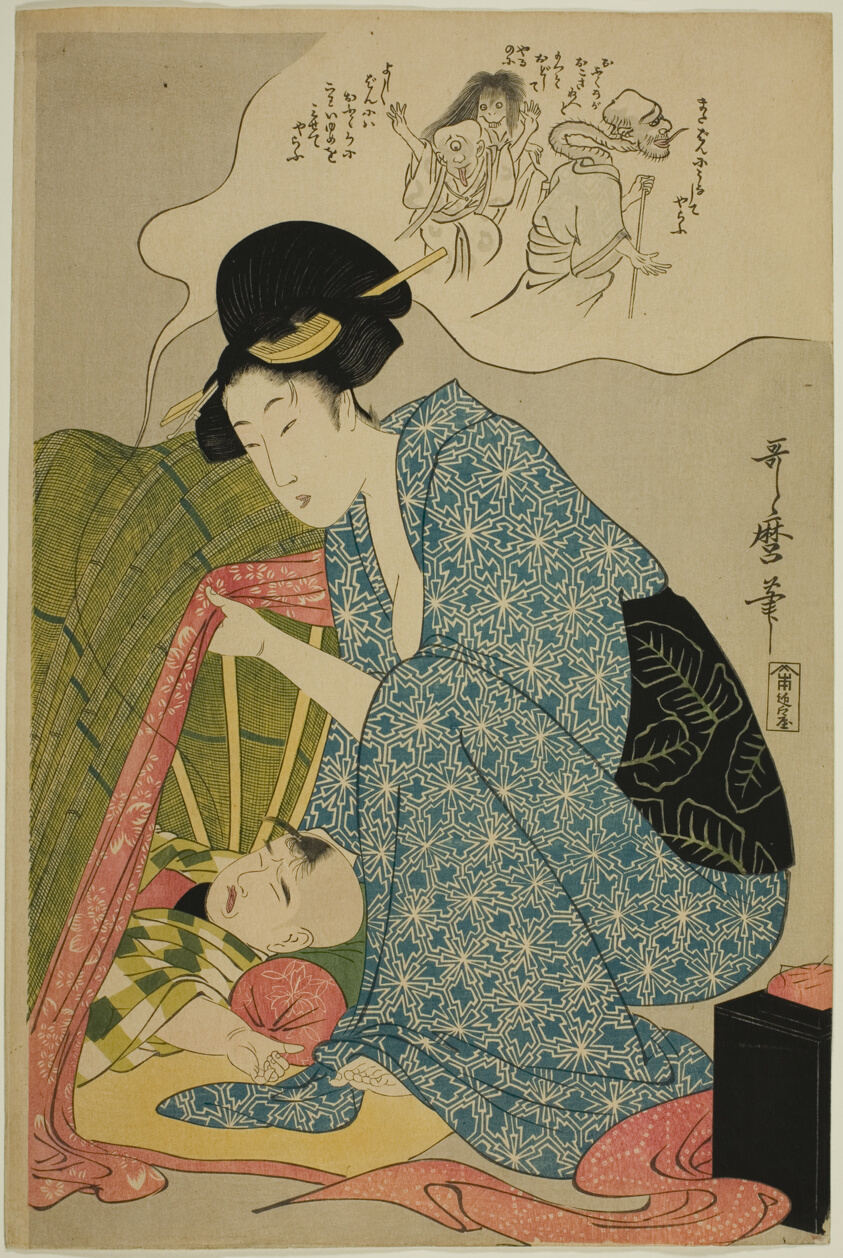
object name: Print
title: Child's nightmare of ghosts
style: Japanese (culture or style), edo (japanese period), Japanism, East Asian, asian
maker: Kitagawa Utamaro 喜多川 歌麿; Japanese, 1753 (?)-1806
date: c. 1800/01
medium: Color woodblock print; oban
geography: Japan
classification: woodblock print; print; asian art